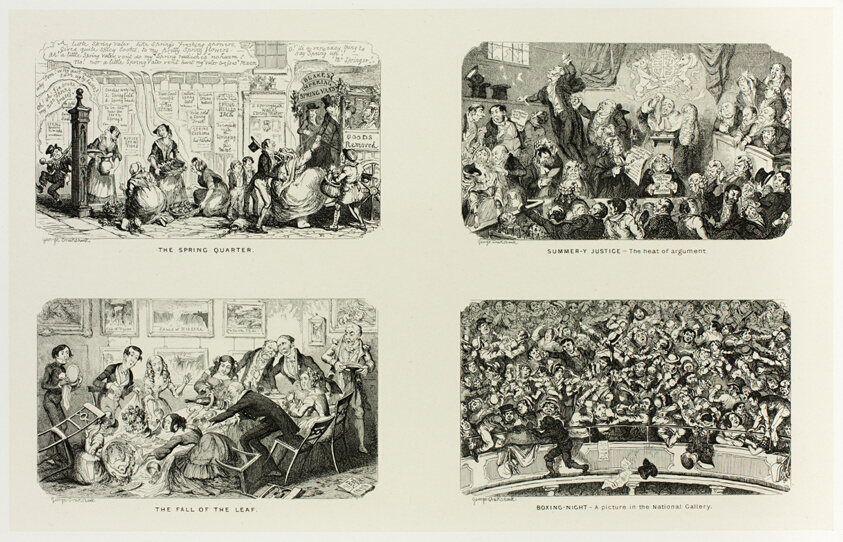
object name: Print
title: The Spring Quarter from George Cruikshank's Steel Etchings to The Comic Almanacks: 1835-1853 (top left)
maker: George Cruikshank (English, 1792-1878); published by Pickering & Chatto (English, 19th century)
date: 1845, printed c. 1880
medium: Four steel etchings in black on cream India paper, laid down on off-white card (chine collé)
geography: England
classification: etching; paper; print; prints and drawing